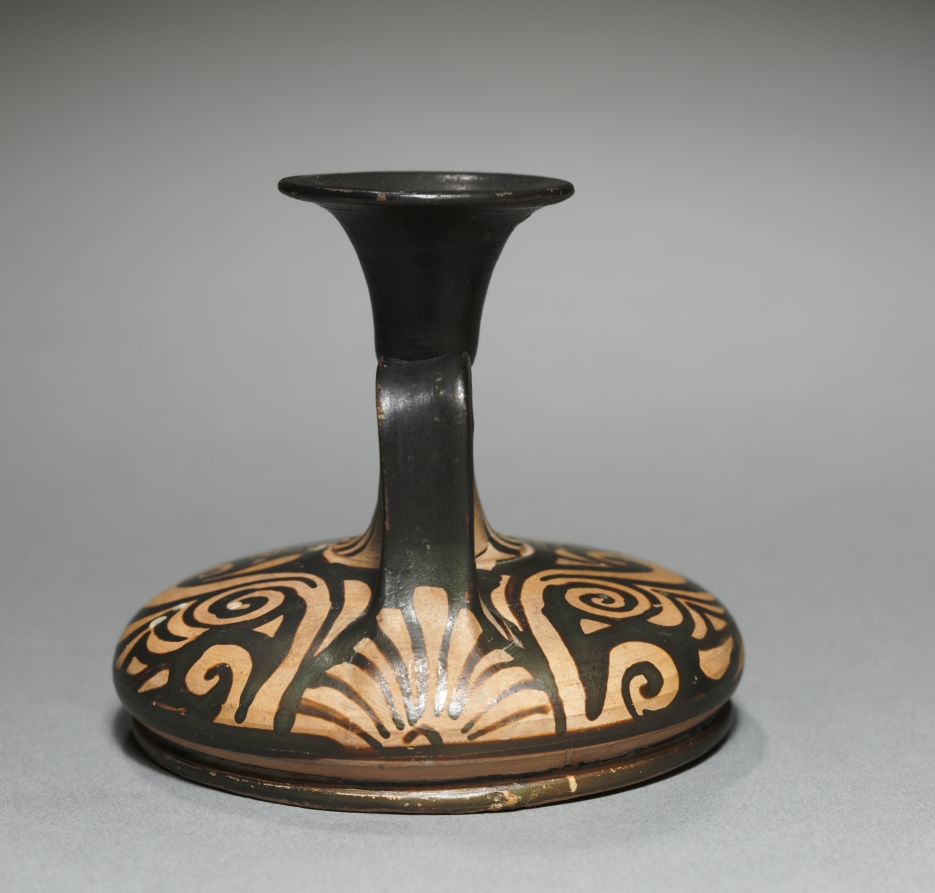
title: Red-Figure Squat Lekythos (Oil Vessel): Female Head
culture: South Italian, Apulian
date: 350–300 BCE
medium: ceramic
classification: Ceramic